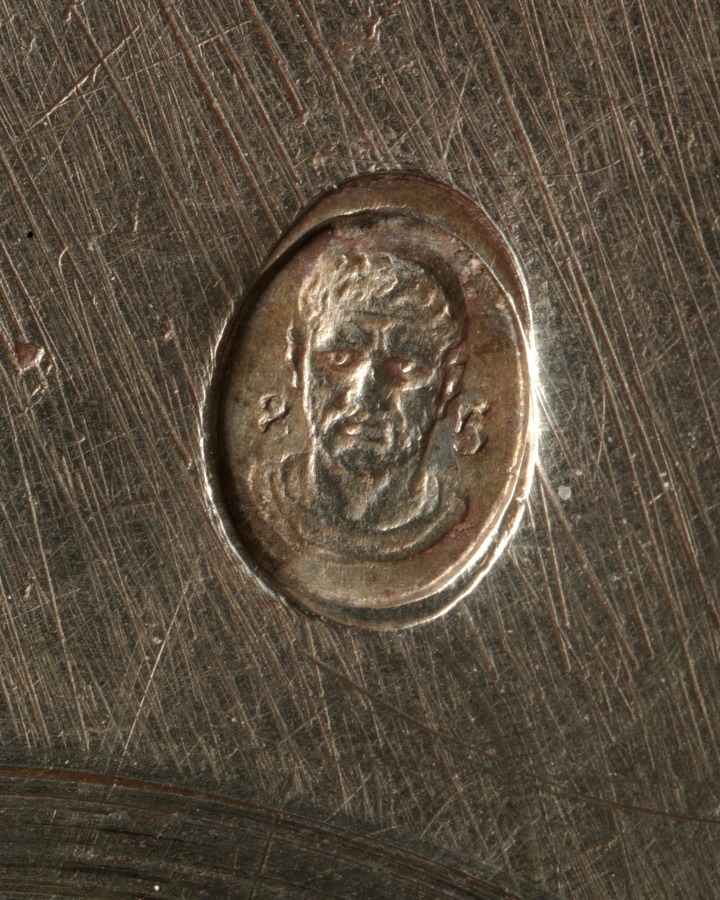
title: Covered Tureen on Stand (Pot à oille)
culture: France, late 18th-early 19th Century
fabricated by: Henry Auguste (French, 1759–1816)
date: 1797–98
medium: silver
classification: Silver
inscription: [Coat-of-arms of Amoral don Federico Carlos Gravina on bowl; cover; stand]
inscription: [Assay mark for large-sized work, 1798-1809, lining exterior; tureen foot exterior]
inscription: [Assay mark for medium-sized work, 1798-1809, beneath stand foot; on edge of cover]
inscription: [Maker's mark of Henri Auguste, master silversmith in 1785, beneath tureen foot; beneath stand foot; inside stand foot edge]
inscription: [Official assay mark for first standard silver, Paris, 1798-1809, beneath stand foot; lining exterior; on cover]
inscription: [Official mark for silver imported from countries with customs conventions, 1838-1912, beneath stand foot; edge of cover; tureen lip exterior; lining exterior; on one tureen handle; outside stand foot; tureen foot exterior]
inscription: [Unknown mark, possibly Ceres' profile in square with "E" and "7", beneath stand foot; on cover; rim of lining; tureen foot exterior; tureen lip exterior]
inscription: [Unofficial assay mark for first standard silver, Paris, 1794-1797, beneath foot stand; beneath tureen foot; near tureen handle exterior]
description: This pot-à-oille was designed by master goldsmith Henri Auguste after drawings by draftsman and sculptor Jean Guillaume Moitte. Though many of the neoclassical decorative elements on this piece are pulled from Moitte’s design, Auguste’s final product leaves out much of the proposed ornamentation. Instead this object finds distinction in its large size and smooth expanses of silver that emphasize the purity of its lines.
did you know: The coat of arms on the body of the work corresponds to the family of Federico Carlos Gravina, a Sicilian-Spanish admiral who was known to have had a close diplomatic relationship with Napoleon I.